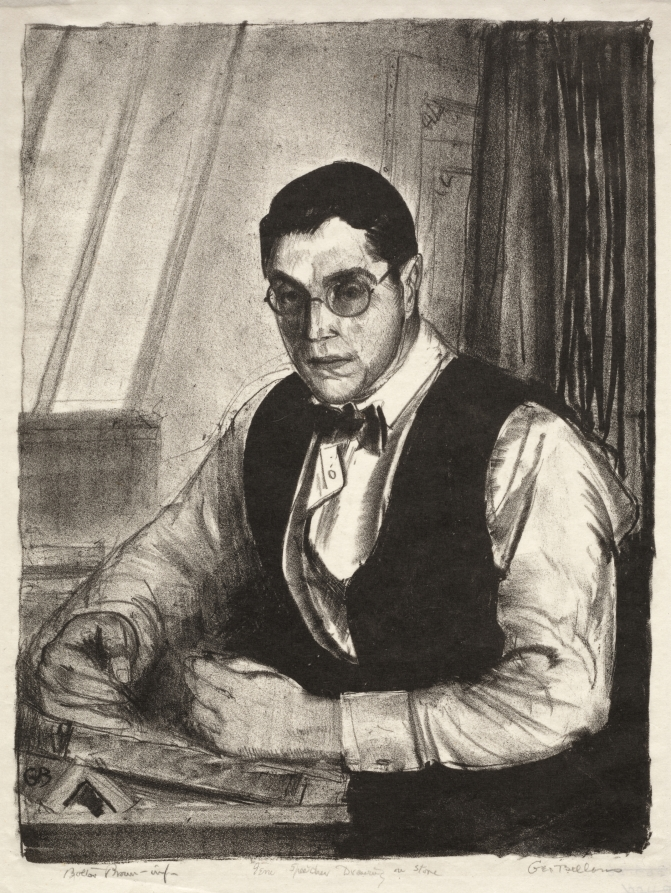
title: Gene Speicher Drawing on a Stone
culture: America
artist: George Bellows (American, 1882–1925)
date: 1924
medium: lithograph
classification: Print